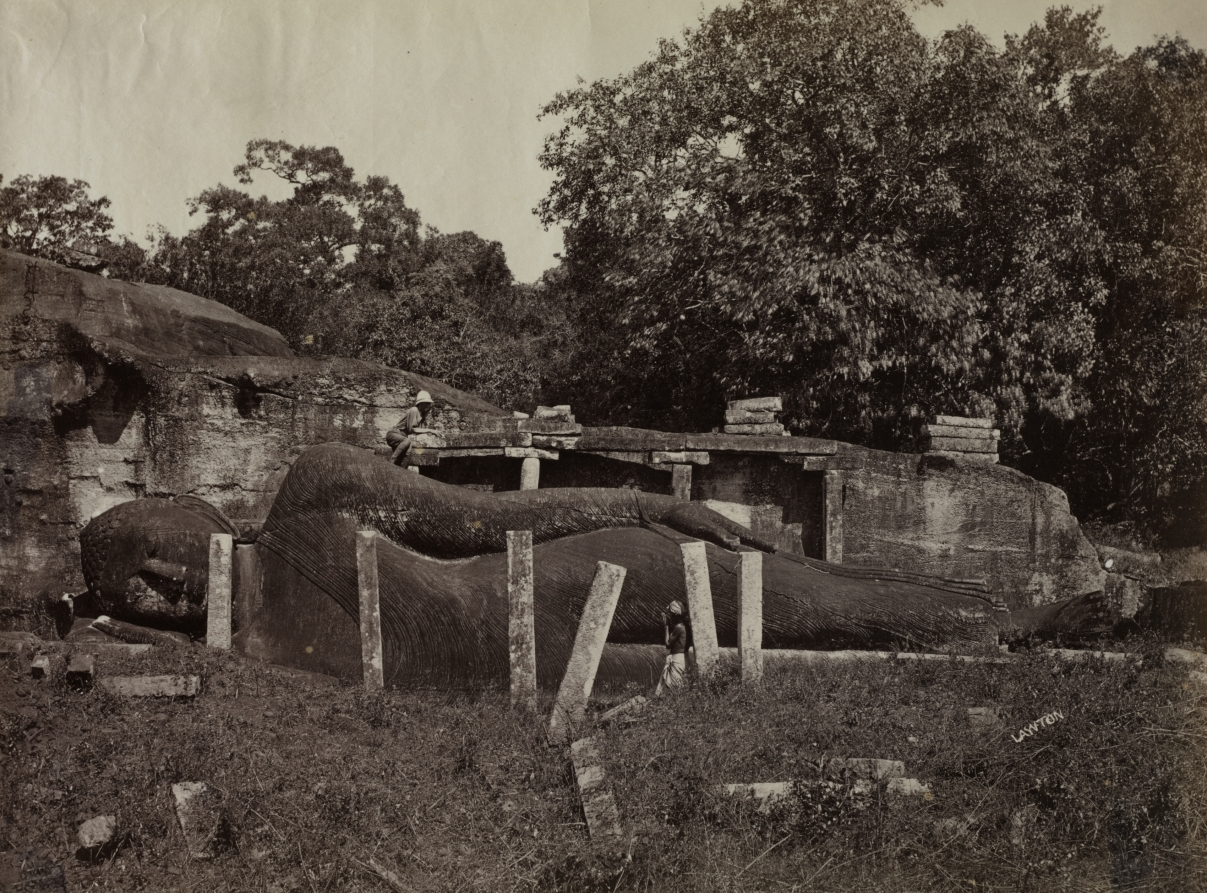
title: The Paranirvana of Buddha, Gal Vihara, Polonnaruva, Ceylon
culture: England, 19th century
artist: Joseph Lawton (British, d. 1874)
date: 1870–71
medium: albumen print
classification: Photograph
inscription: Written in pencil on recto of mount: "Reclining Buddha at the Gal Vihara Polonnaruva"; in pencil on verso: "#15"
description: During the British colonial period in Sri Lanka (Ceylon), a 12th-century monastic establishment with a colossal stone sculpture of the reclining Buddha had fallen into ruins. The photographer’s intentional inclusion of a Sri Lankan man, leaning against a pillar at the front of the composition, and a colonial Englishman, clambering over Buddha’s body, underscores how differently they interact with the site. The Sri Lankan visitor views the ruins with devotional reverence; the Englishman treats it as a place of adventurous entertainment.